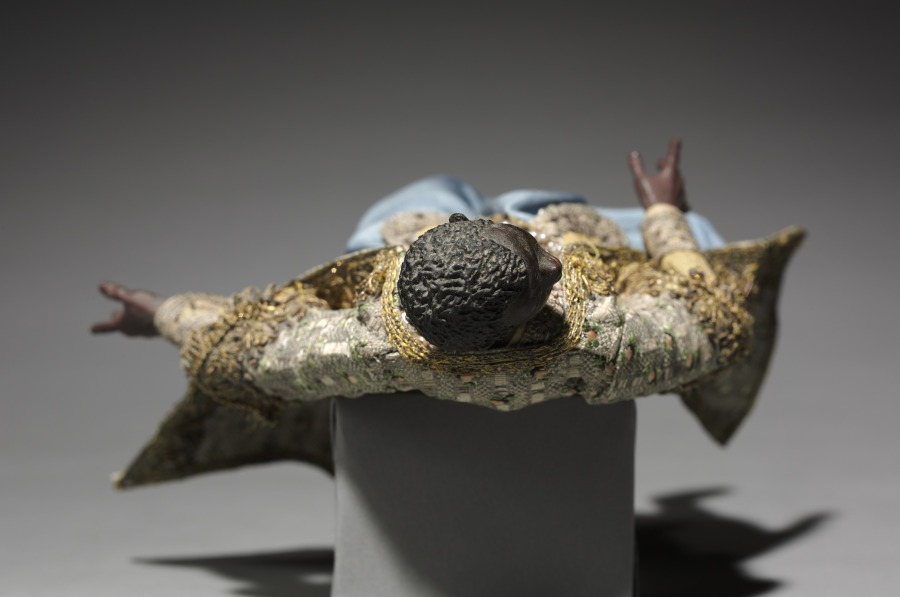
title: Figure from a Crèche: Attendant of the Magi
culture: Italy, Naples, late 18th-early 19th century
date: 1780–1830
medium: painted wood and terracotta with various textiles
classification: Sculpture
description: The practice of creating scenes of the Nativity for the home dates from the early 1700s in Italy, where people began to set up doll-like figures of about a foot or less in height. The custom was particularly popular in Naples around 1800, where crèche scenes (crèche means cradle, or crib) included many figures, whose heads and hands of painted terracotta, stuffed cloth bodies, and clothing adapted from contemporary local costumes gave them an amazingly realistic character. Representations of the birth of Jesus can be traced to the first few centuries of Christianity. Both living creatures and sculptural depictions of them were used from early times. By the late Middle Ages it was customary to create life-size figures of wood or stone, naturalistically painted, to represent the characters who participated in the events of Jesus's early life. These sculptures were then arranged in scenes illustrating one or both of the most important of these events, the Adoration of the Shepherds and the Adoration of the Magi—the three kings from the east who came to pay homage to the Christ child. Used in churches, these large figures were especially popular in Italy, Central Europe, Spain, and Portugal.